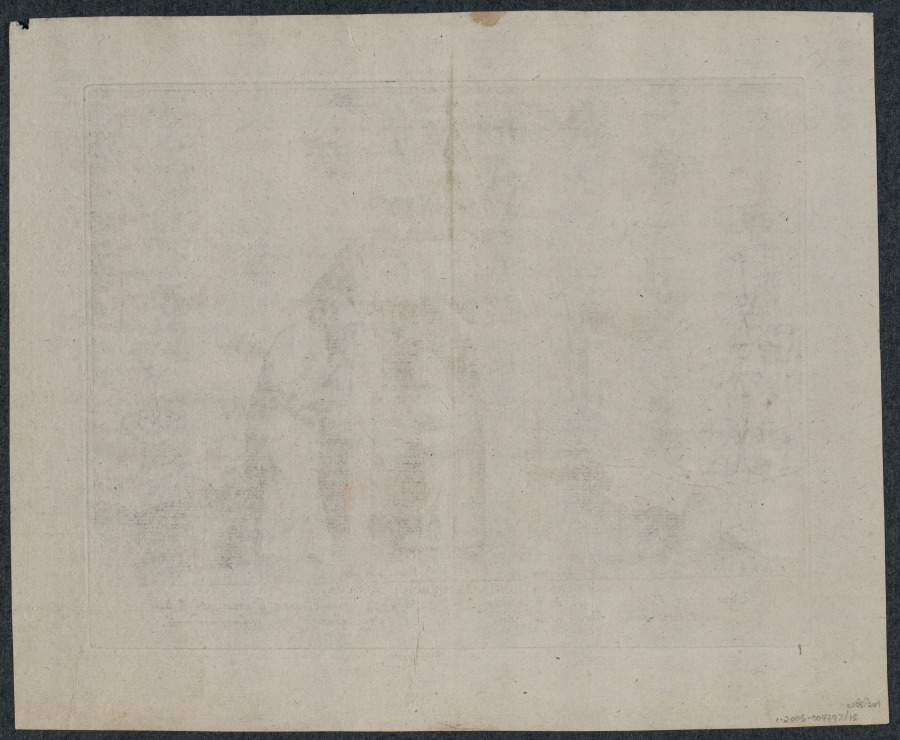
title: Saint Jerome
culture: Flanders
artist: Hans Collaert (Flemish, 1566–1628)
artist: after Maarten de Vos (Flemish, 1532–1603)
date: 1580–1600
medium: engraving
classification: Print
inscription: lower margin, in graphite: 15